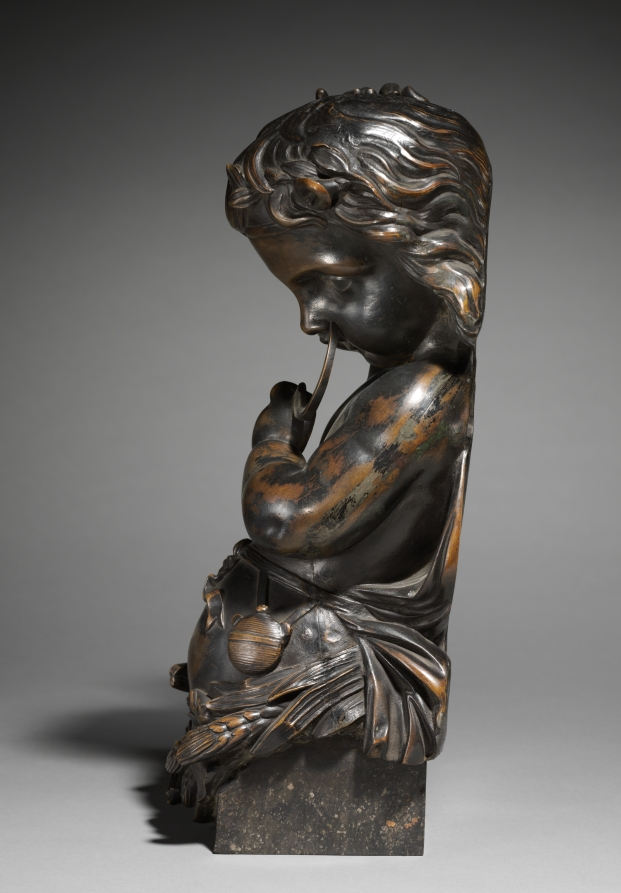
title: Autumn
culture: France, 19th century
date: 1800s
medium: bronze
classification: Sculpture